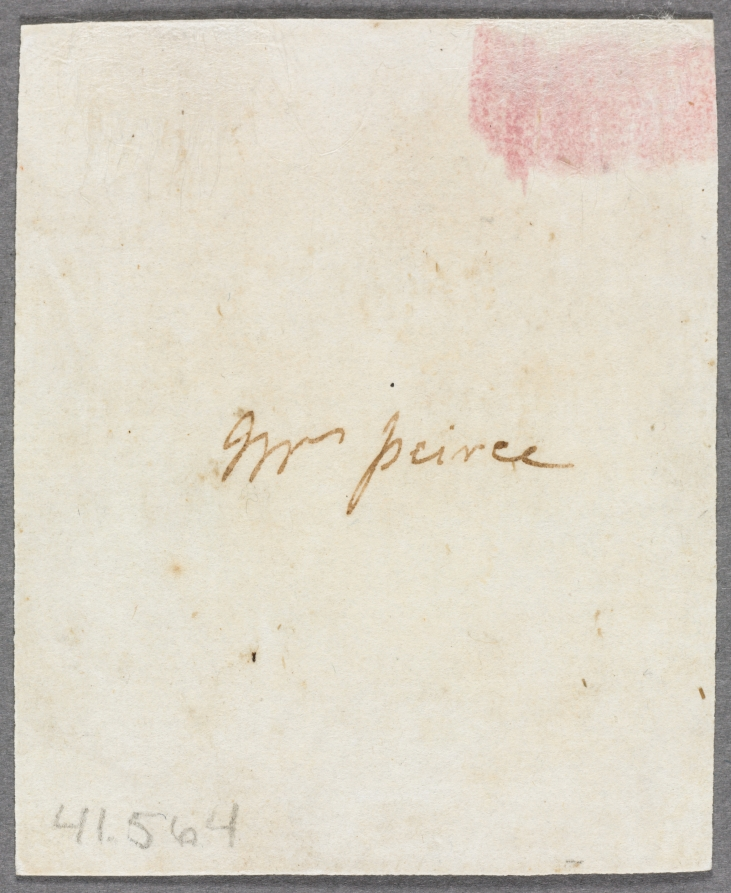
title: Portrait of Anna Maria Woolf, née Smart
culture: England, 18th century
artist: John I Smart (British, 1741–1811)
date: c. 1785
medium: graphite and wash on laid paper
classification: Portrait Miniature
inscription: Signature: none; inscribed on front of paper at upper right corner: 1[?][?]; inscribed on paper backing, in graphite at left center: Indi; upside down, at left above center: 38; inscribed in brown ink at center, on back of drawing: Mrs Peirce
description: Although it is impossible to say whether or not it was always part of the artist’s process to execute a preparatory sketch prior to painting each miniature, we do know that John Smart retained many hundreds of these sketches. A group of preparatory sketches—of which this portrait is one—descended through the Smirke family after Smart’s daughter Sarah gave a sketchbook containing preparatory portrait studies to her friend Mary Smirke, sister of the celebrated Victorian architect Sydney Smirke. This book was probably broken up around 1877 when it was divided between Sydney’s daughters Mary Jemmett and Mrs. Lange, whose portions were both sold at auction in 1928. This portrait was assigned the historically colorful but fictitious title of “Duchess Christina” at some point after memory of its true identity had been lost. Giving illustrious titles to portraits of unknown sitters was a popular strategy adopted by dealers during the nineteenth and twentieth centuries, often applied to miniature portraits and, in particular, to Smart’s sketches of women. Here, the sitter’s head is turned slightly to her left. She has dark brown eyes, rosy cheeks, and long, wavy dark hair falling below her shoulders. She wears a white dress with long sleeves and a ruffled bodice, and a small lozenge-shaped pendant around her neck. She is placed inside a faintly suggested oval, and the background is unpainted. The paper backing—removed in 1993—was inscribed with “38” and “Indi,” which may suggest that the sketch was executed during Smart’s time in India. The inscription that was discovered on the back of the drawing after the paper backing was removed reads, “Mrs [or perhaps Miss] Peirce.” Although the inscription appears to be in the artist’s hand, and in the brown ink he used to annotate his preparatory sketches, its relationship to this portrait is unclear. The sitter is probably Anna Maria, Smart’s eldest daughter by his first wife, whose name is unknown. Anna Maria (1766–1813) traveled with her father to India in 1785, sailing from England on April 19 and arriving in Madras on September 6. If the work was executed in India at the time Anna Maria accompanied her father there, the sketch may be dated to around 1785, the year they moved to the subcontinent. Anna Maria would have been around 18 years old. The fact that this portrait is of an older girl who dons a plain, modest dress and wears her hair down suggests an intimacy not found in the type of portraits Smart commonly executed of women wearing fine gowns and elaborately dressed hair.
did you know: After living in India for many years, Anna Maria was en route to England when she was forced to disembark at St. Helena to give birth to her son.